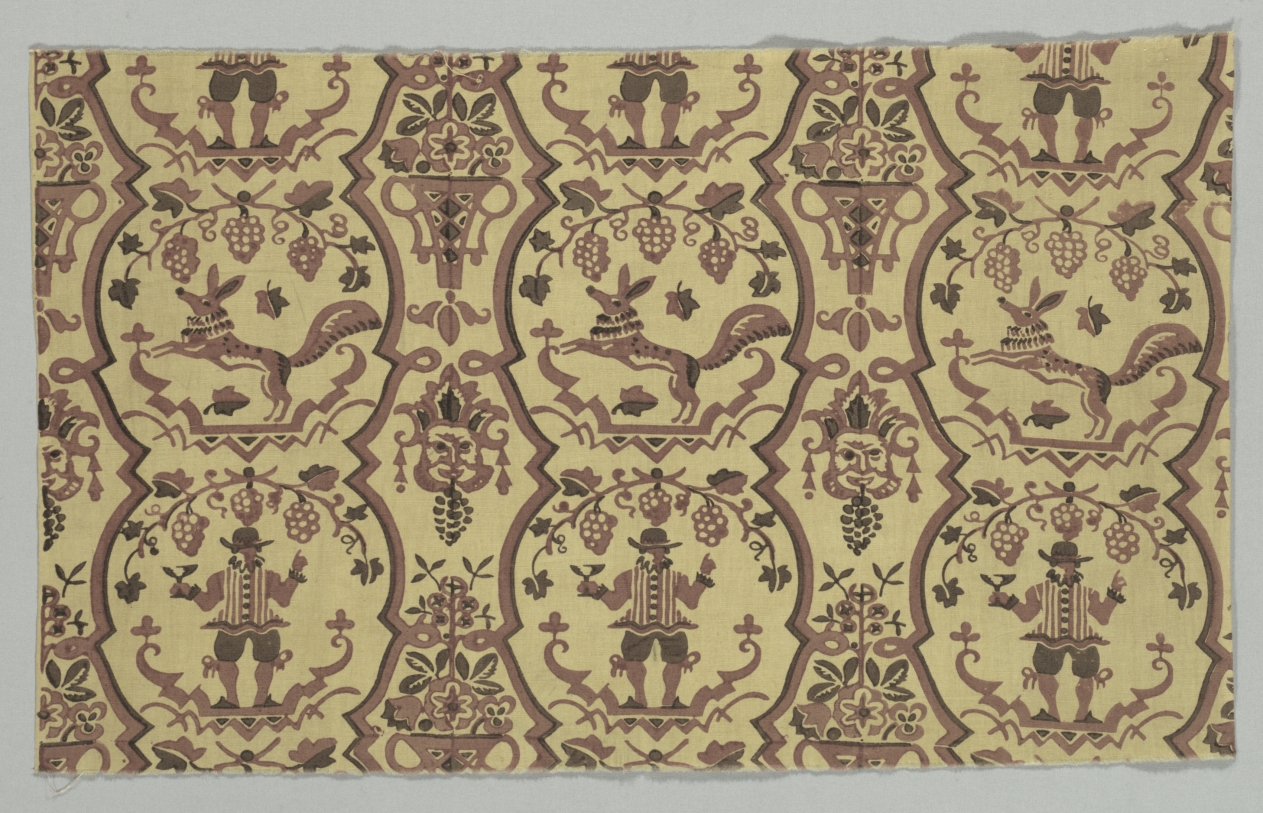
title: Fox and Grapes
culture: Germany, Munich, 20th century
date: 20th century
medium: plain weave cotton, printed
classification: Textile